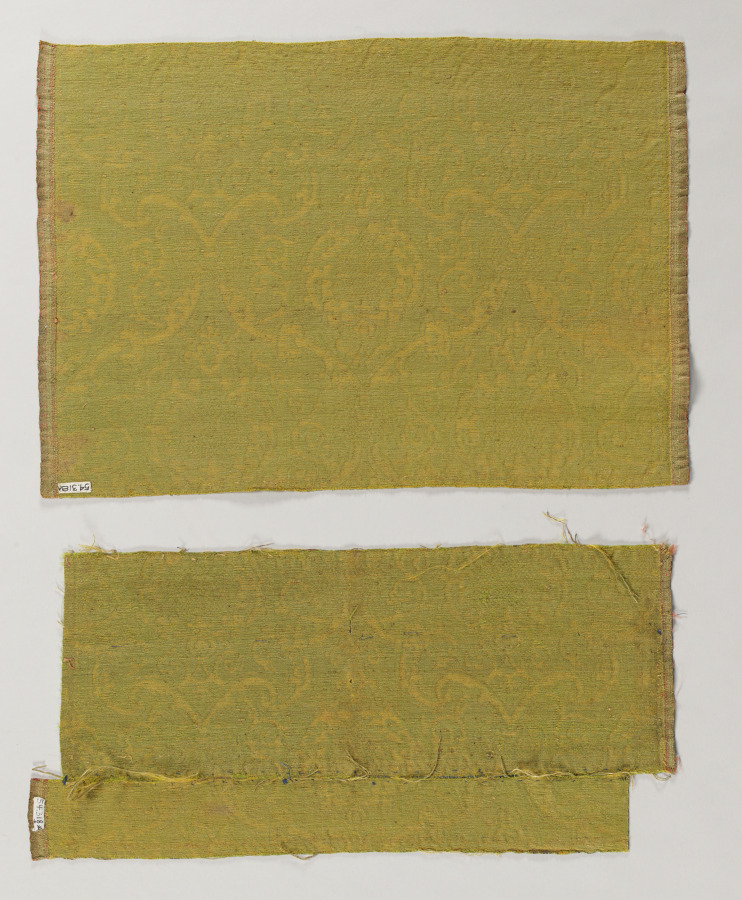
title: Lengths of Fabric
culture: Italy or Spain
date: 1500s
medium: silk and linen: brocade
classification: Textile